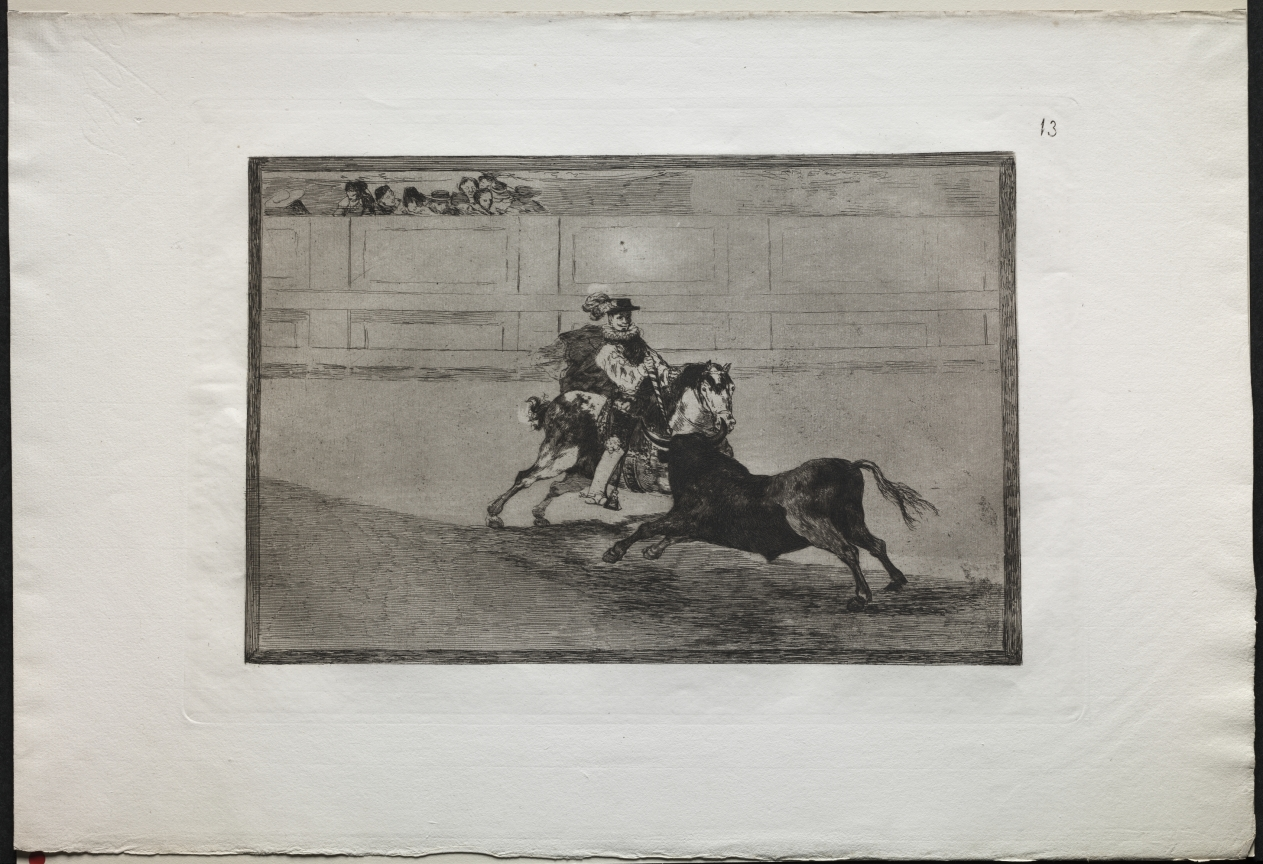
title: Bullfights: A Spanish Mounted Knight in the Ring Breaking Short Spears Without the Help of Assistants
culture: Spain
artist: Francisco de Goya (Spanish, 1746–1828)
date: 1816, printed 1876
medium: engraving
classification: Print